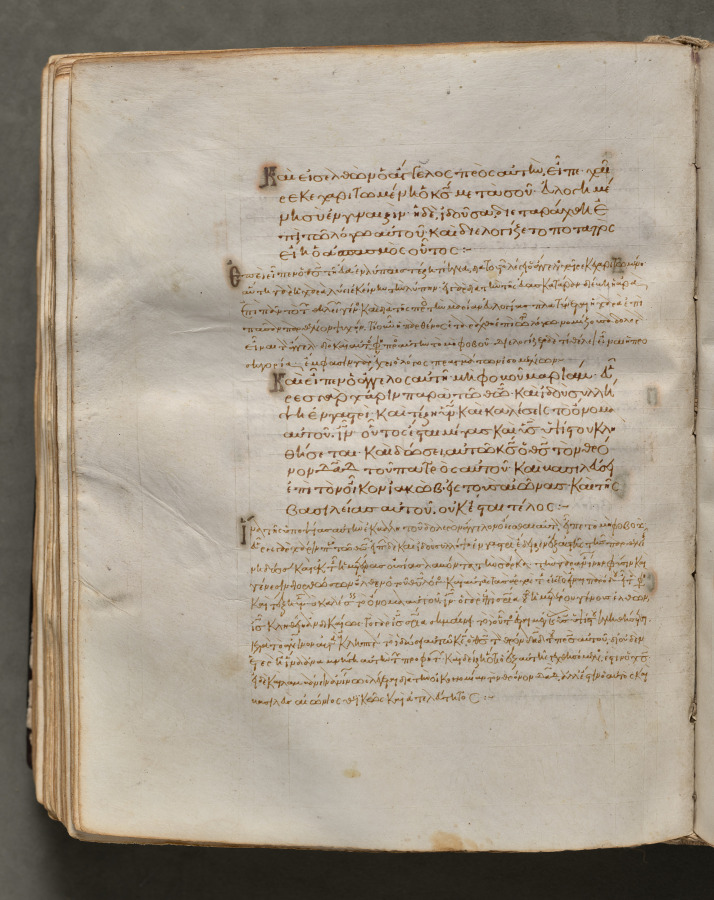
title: Text, folio 203 (verso), from a Gospel Book with Commentaries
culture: Byzantium, Constantinople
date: c. 1000–1100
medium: ink, tempera, and gold on vellum; leather binding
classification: Bound Volume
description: Each of the four gospels in this book opens on a page with brilliantly illuminated borders depicting the author of the text as well as birds-principally peacocks, symbols of the immortality of the soul-and fountains, representing the fountain of life and the salvation of the soul. This volume consists of 428 leaves with texts in Greek. Its level of sophistication suggests that it was probably written and decorated in a monastery in Constantinople.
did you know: Gospel Books were carried in procession through Byzantine churches.